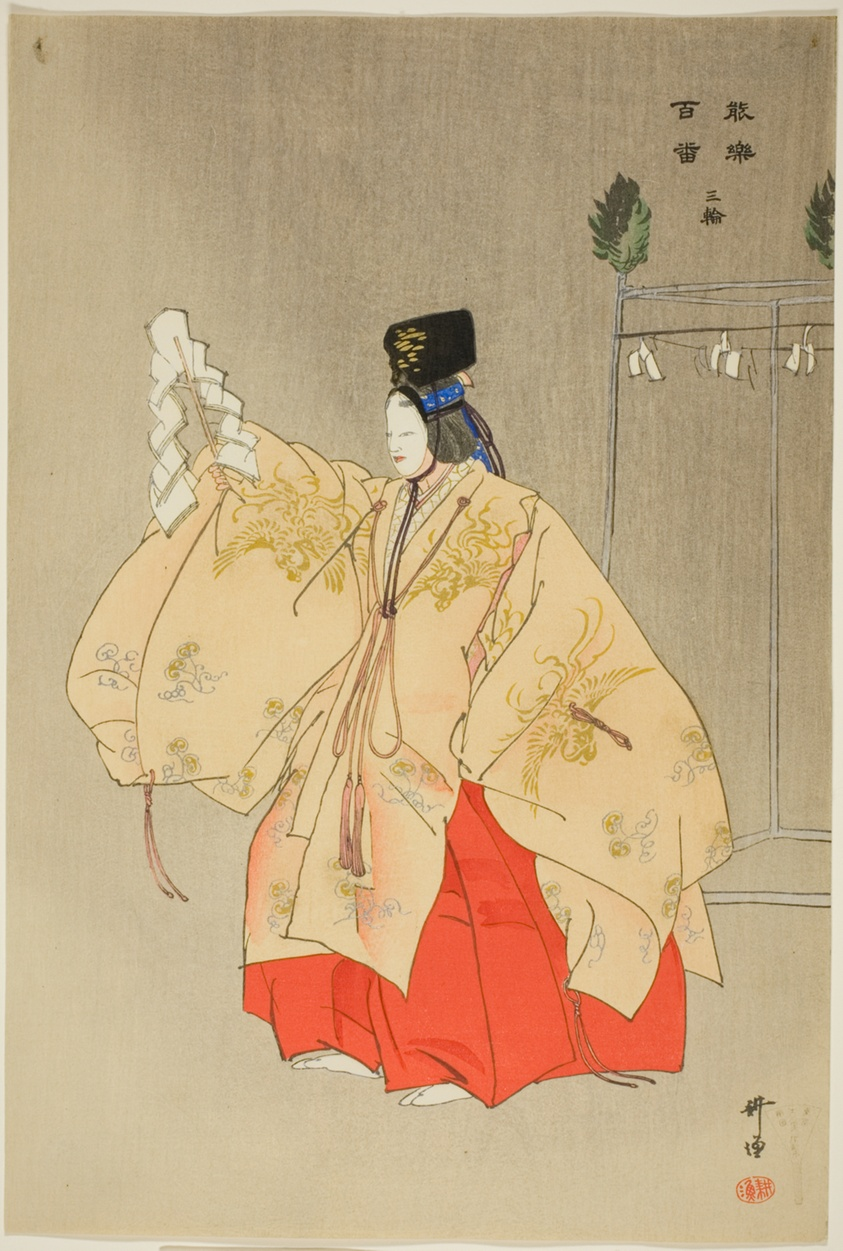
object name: Print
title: Miwa, from the series "One Hundred No Dramas (Nogaku hyakuban)"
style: Japanese (culture or style)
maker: Tsukioka Kogyo; Japanese, 1869-1927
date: 1898/1903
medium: Color woodblock print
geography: Japan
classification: woodblock print; print; asian art